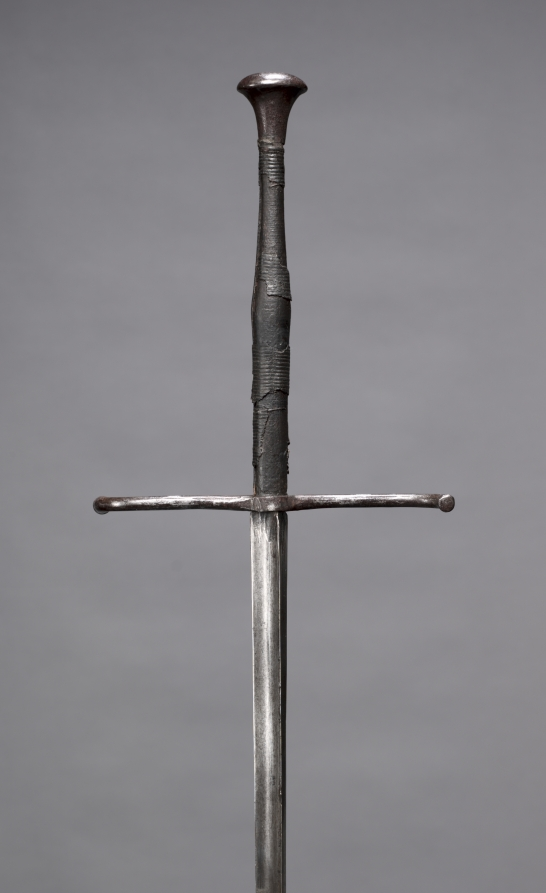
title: Estoc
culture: Germany, early 16th Century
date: early 1500s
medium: steel, wood and leather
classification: Arms and Armor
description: The French word estoc means "thrust" and therefore was adopted as the name for this long thrusting sword. It has a fairly long grip and simple cross-shaped hilt. The rigid blade, designed for thrusting at armored opponents, is three-sided for strength. The estoc was sometimes carried from the saddle. From the early 1300s, it was used by cavalrymen as an auxiliary side arm when a horseman had dismounted.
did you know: Swords like this one were developed to counteract and pierce the increasingly heavy armor and sophisticated plates that nearly covered a knight.